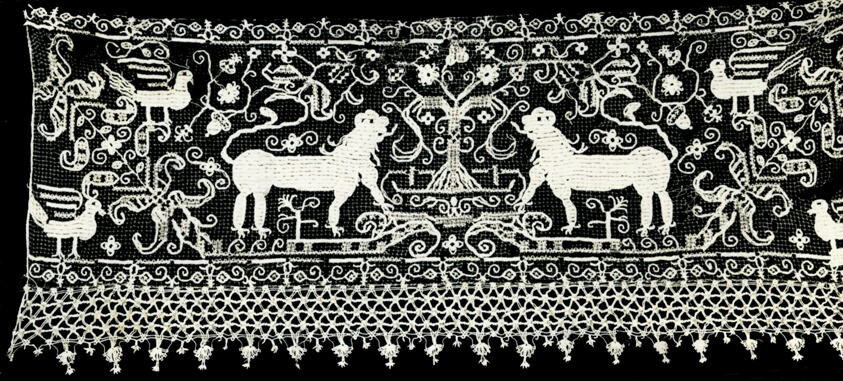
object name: Textile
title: Flounce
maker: Italy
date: 17th century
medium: darned filet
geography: Italy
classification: textile; needlework - lace; needlework (visual works)